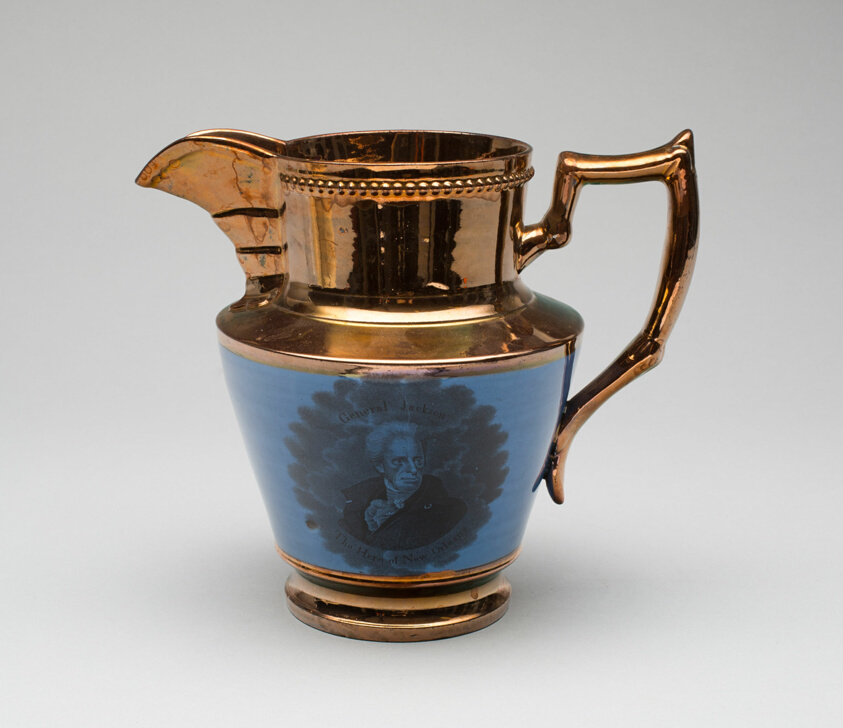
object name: Decorative Arts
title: Pitcher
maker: English for the American market; Staffordshire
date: 1830–50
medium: Earthenware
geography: Staffordshire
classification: pitcher (vessel); earthenware; vessel; american decorative arts; ceramics; decorative arts